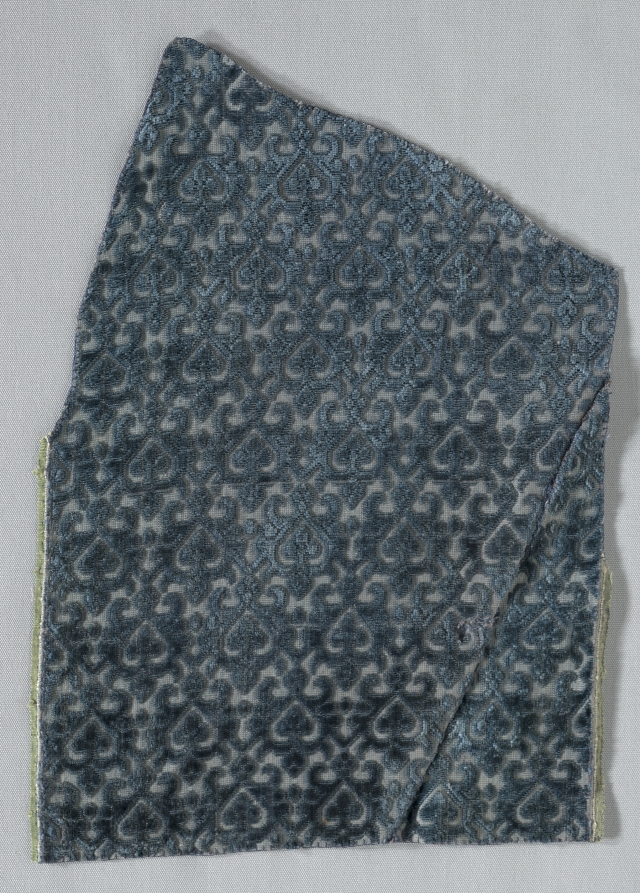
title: Velvet Fragment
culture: Italy, late 16th - early 17th century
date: late 1500s - early 1600s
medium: velvet (cut and uncut); silk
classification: Velvet